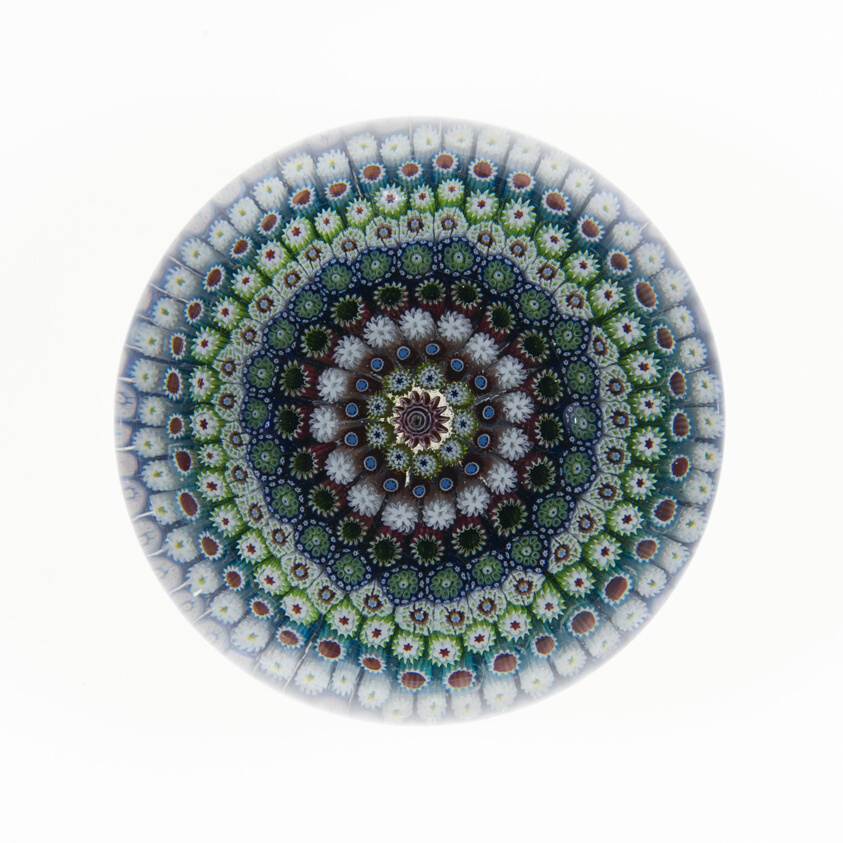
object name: Glass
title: Paperweight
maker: Saint-Louis Glassworks (Cristalleries de Saint-Louis); Lorraine, France, founded 1586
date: c. 1845/60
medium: Glass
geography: Saint-Louis-lès-Bitche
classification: paperweight; glass